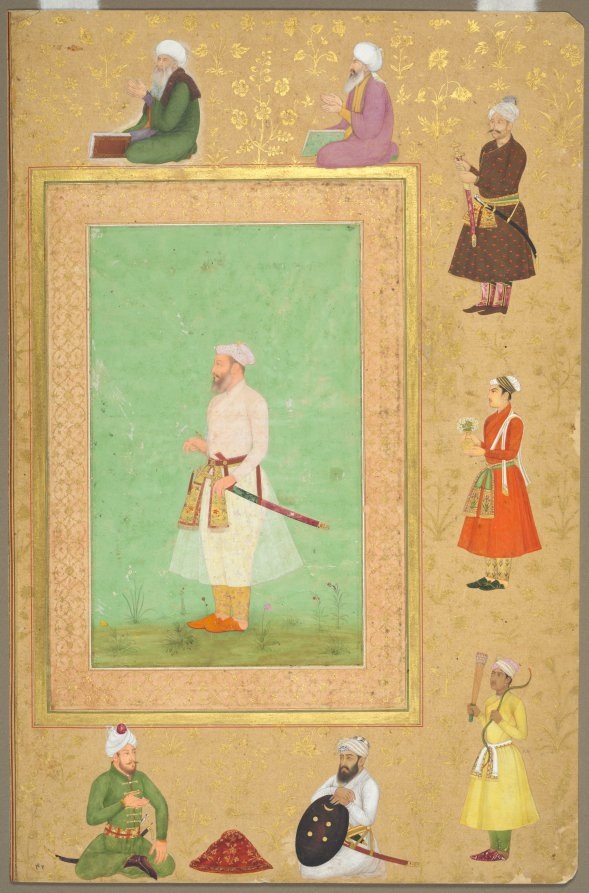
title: Portrait of Asaf Khan (1569–1641), from the Late Shah Jahan Album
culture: Mughal India, court of Shah Jahan (1627–58)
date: c. 1653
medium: Gum tempera and gold on paper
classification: Painting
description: Asaf Khan, born in Iran, was a general and close advisor to Mughal emperors Jahangir (reigned 1605–27) and Shah Jahan (reigned 1627–58). He was also Jahangir’s brother-in-law and Shah Jahan’s father-in-law. The figures in the borders show that Asaf Khan was both a scholar and a soldier. At the top, mullahs (learned Muslim clerics) with books gesture in discourse, while two soldiers converse at ease below. Three retainers stand at the side presenting a sword, a vase of narcissus, a bow, and arrows. He has strapped on a sheathed sword and tucked a stabbing dagger and book into his elegantly embroidered floral sash.